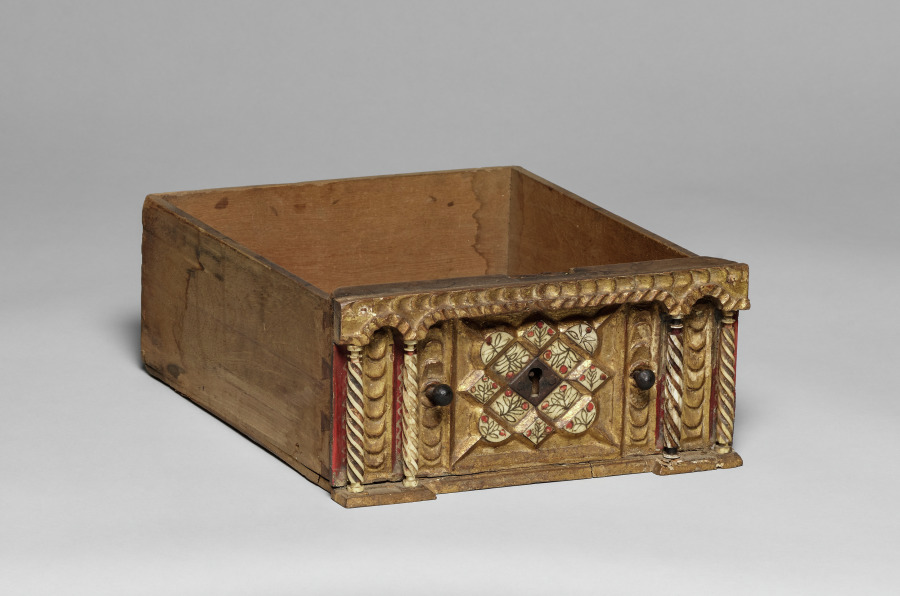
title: Chest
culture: Spain, Colonial, late 17th Century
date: late 1600s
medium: turned and joined wood, gilded and painted red with applied bone columns and bone inlays, wrought iron hardward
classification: Furniture and woodwork